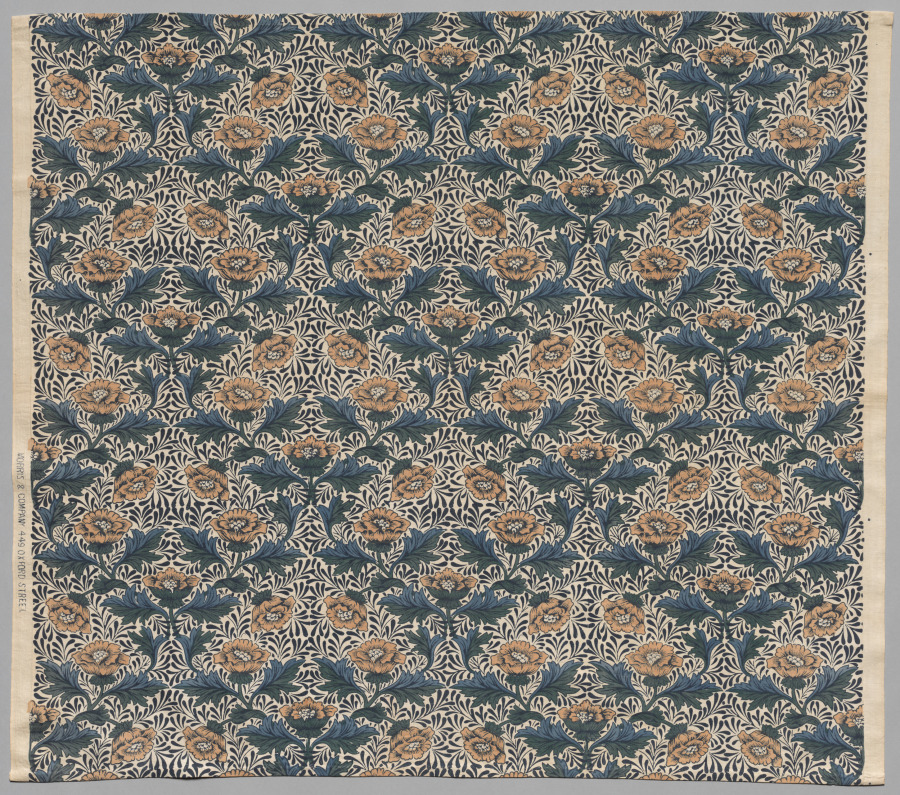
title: Peony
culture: England, 20th century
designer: Kate Faulkner (British, 1841–1898)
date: 1920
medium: plain weave cotton, printed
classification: Textile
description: Peony was probably designed for Morris & Co. by Kate Faulkner, the sister of William Morris’s early business partner Charles Faulkner. The small, almost square repeat of this pattern is more characteristic of Kate than of Morris, who favored larger patterns. She also designed embroidery, wallpaper, painted tiles and pottery, and plaster decoration for the firm. Morris had a progressive attitude toward women as co-laborers, and promoted the work of designers such as Kate, whose patterns challenged the monotony of much of the needlework and domestic crafts that then occupied middle-class women.